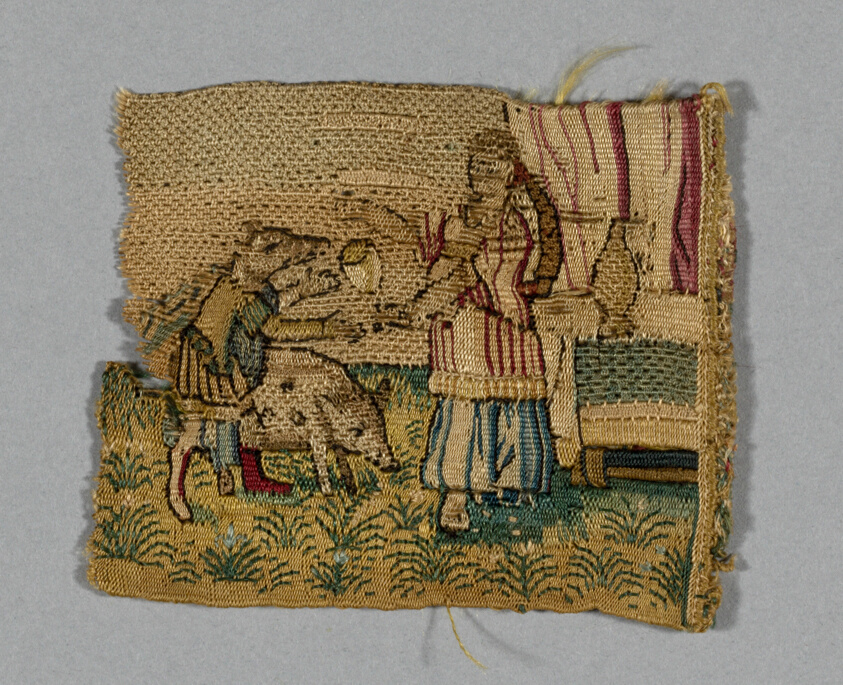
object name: Textile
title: Fragment of a Band Depicting Scene from Homer's Odyssey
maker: England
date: 16th/17th century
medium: Silk, weft twining with interlocked wefts and embroidered in back stitches; couching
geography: England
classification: textile; needlework (visual works)